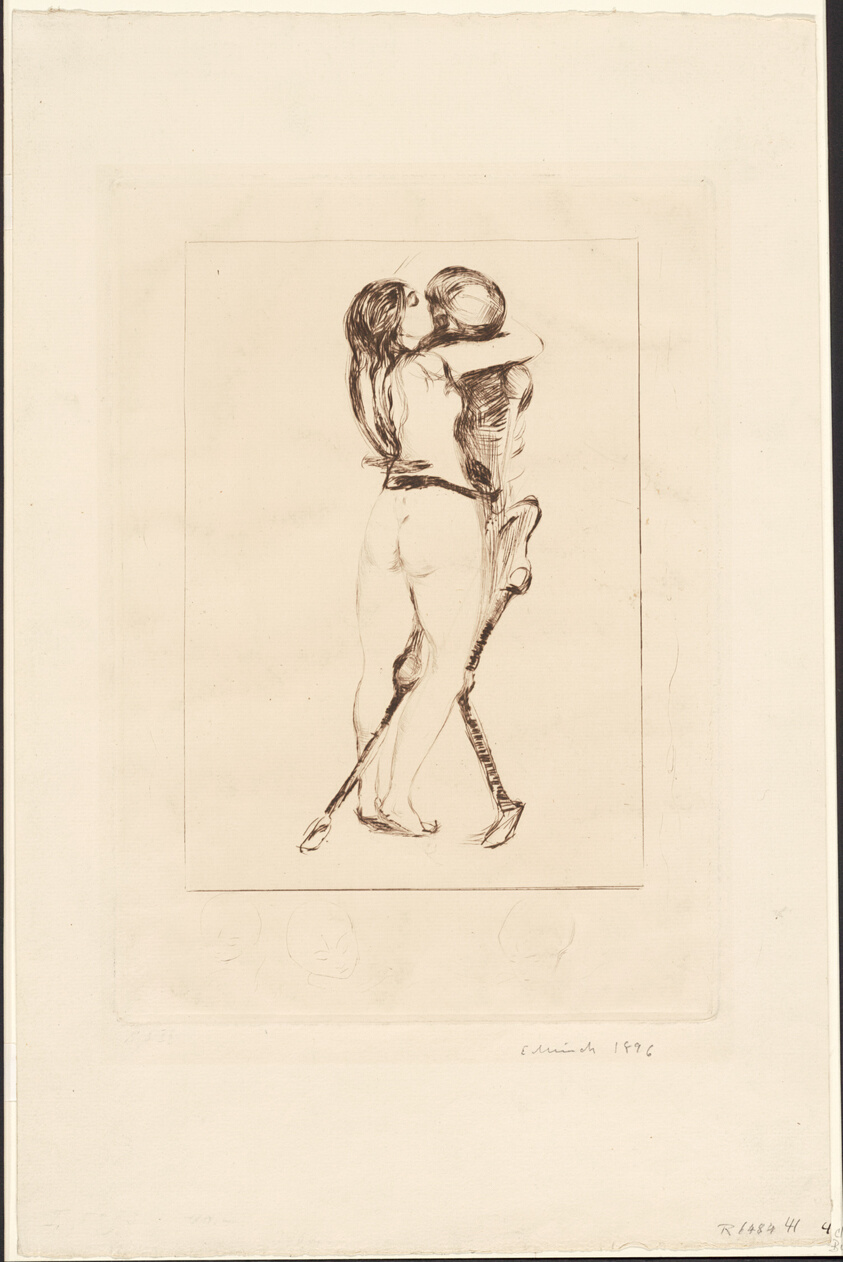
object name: Print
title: Death and the Woman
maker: Edvard Munch (Norwegian, 1863-1944); printed by Otto Felsing (German, born 1854)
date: 1894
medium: Drypoint on cream laid paper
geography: Norway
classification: drypoint; print; prints and drawing